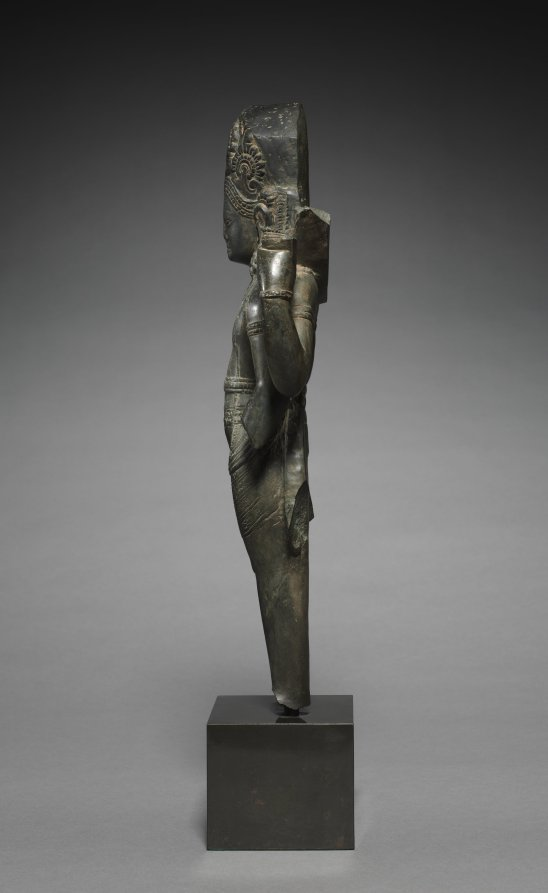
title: Vishnu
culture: Nepal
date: 800s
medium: schist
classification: Sculpture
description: The axial stance and somber expression visually amplify the powerful nature of this four-armed Hindu god. The crown and fine textiles communicate his regal qualities. In his upper left hand, a conch shell signals the start of battle or the sound of OM at the opening of a mantra recited to quell inner demons. Vishnu’s followers glorify his ability to destroy demonic forces that bring imbalance and disorder, both throughout the world and within oneself.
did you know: The dark stone was highly polished and once gleamed like bronze.